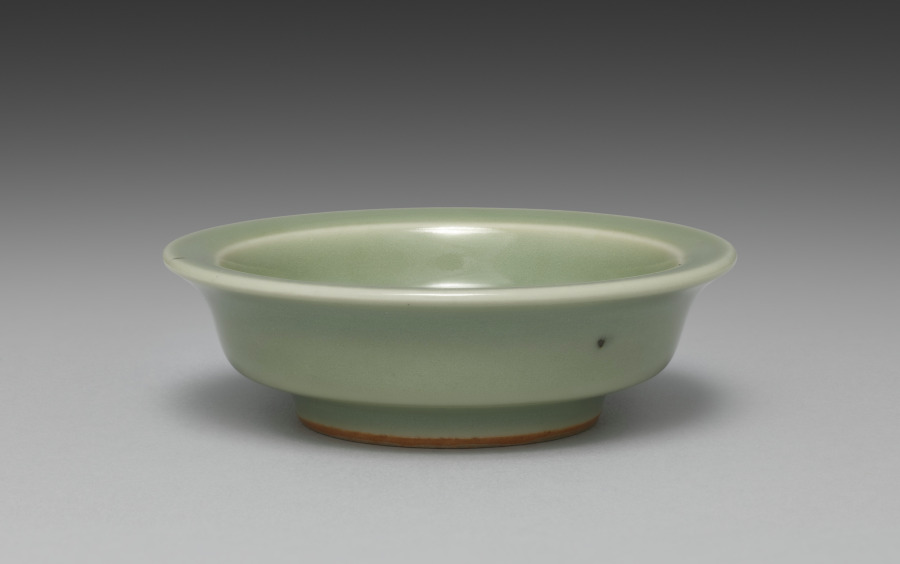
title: Saucer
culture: Japan, Meiji period (1868–1912)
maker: Seifū Yohei III (Japanese, 1851–1914)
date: 1893–1914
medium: One from a set of ten dishes; porcelain with green glaze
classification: Ceramic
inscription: 清風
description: Yohei III’s main output for his sophisticated clientele was in the form of tea sets and dining sets. He created a range of dishes in green glazes. He often produced in pairs, sets of five, or sets of ten. For this set of ten small dishes in a simple, round form that emphasizes the glaze above all, the box lid designates the piece as seiji, or green-glazed porcelain, using a general term for the extensive palette of green glazes often called celadon in English. The box lid further identifies the dishes themselves as tōchō, literally “bean-sized saucers,” a size that makes them suitable for dipping sauces.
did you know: The ten dishes in this set are stored in stacks of five in a two-compartment box.